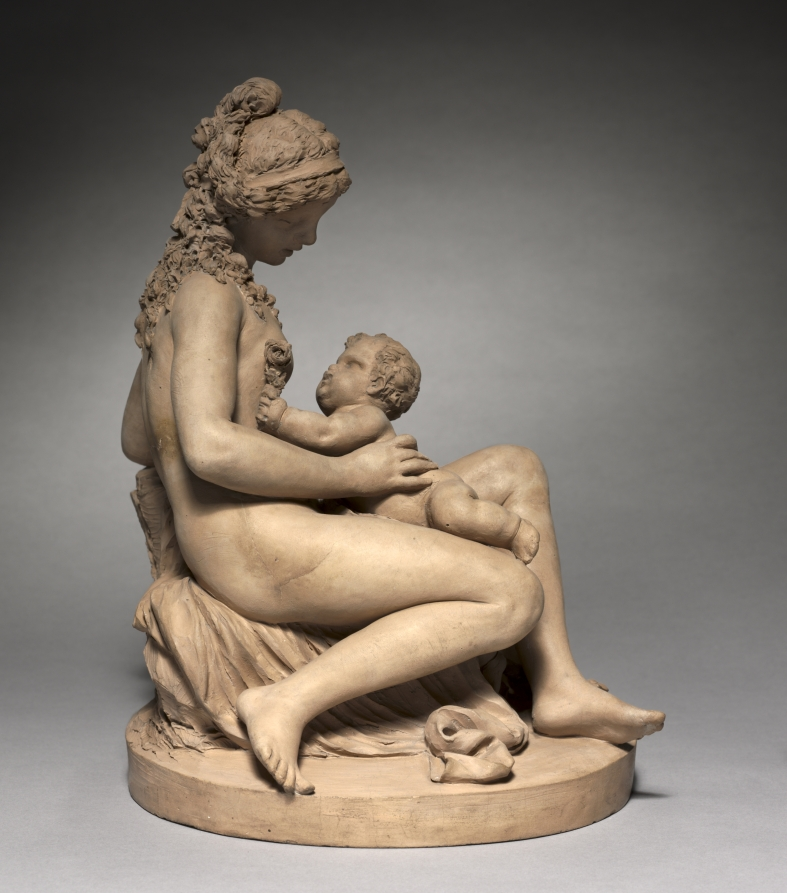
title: Young Woman and Child at Play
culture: France, 18th century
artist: follower of Clodion (French, 1738–1814)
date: 1780s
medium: terracotta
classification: Sculpture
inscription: inscribed: Clodion.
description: The French sculptor Claude Michel, called Clodion (1738–1814), constructed much of his work in terracotta. After firing, the unglazed color of the clay can vary widely, so each of Clodion's works in this medium has a slightly different hue, in this case a smooth reddish gray. Clodion depicts a mother nursing her newborn with painstaking attention to detail, from the tendrils of hair that cascade gracefully down to the mother's shoulders to the brilliant bouquet at the pair's feet.